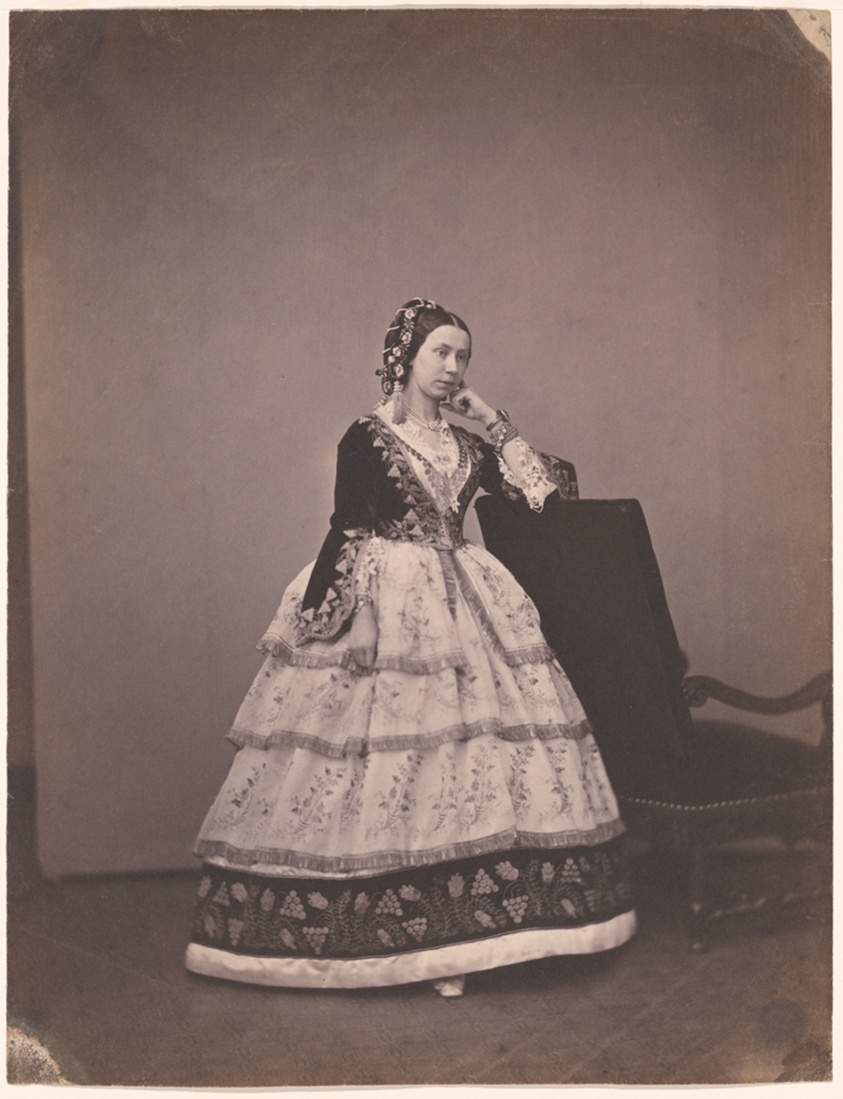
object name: Photograph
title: Madame Carrelle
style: 19th century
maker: Pierre-Louis Pierson, French, 1822-1913; Louis Frédéric Mayer, French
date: 1856/57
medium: Salted paper print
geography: France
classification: salted paper print; photographic process; photography; photograph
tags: Paris, portraits: female subject, photography, portraits